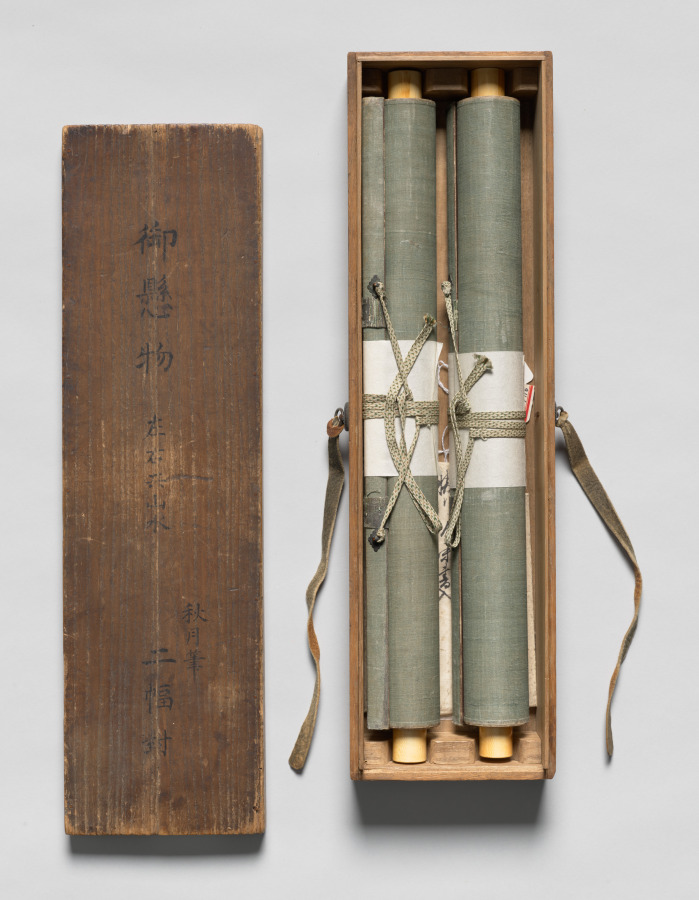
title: Landscapes with Figures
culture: Japan, Muromachi period (1392–1573)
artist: Shūgetsu Tōkan (Japanese, 1440?-1529)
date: c. 1500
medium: pair of hanging scrolls; ink on paper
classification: Painting